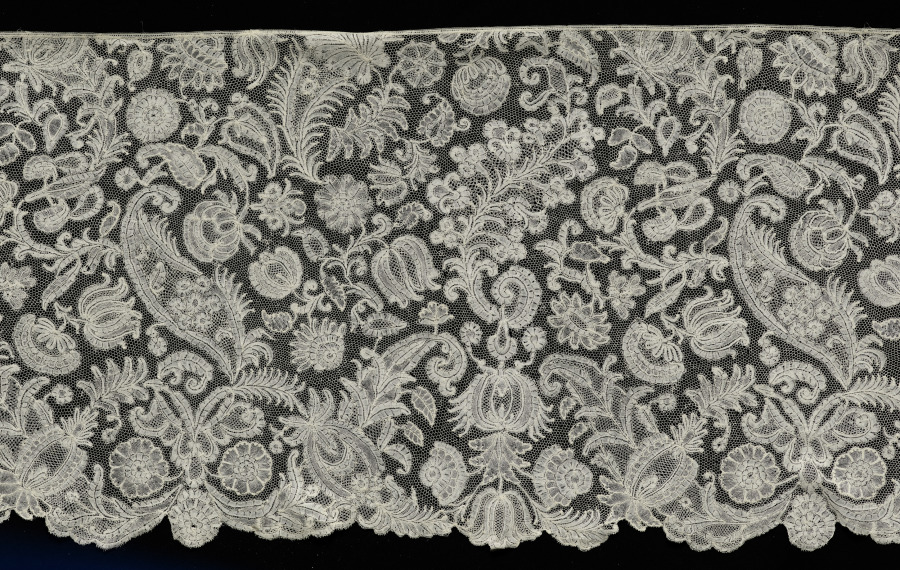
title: Lace Edging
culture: Belgium, Brussels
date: 1700s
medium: Linen: bobbin lace (Point d'Angleterre)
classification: Lace